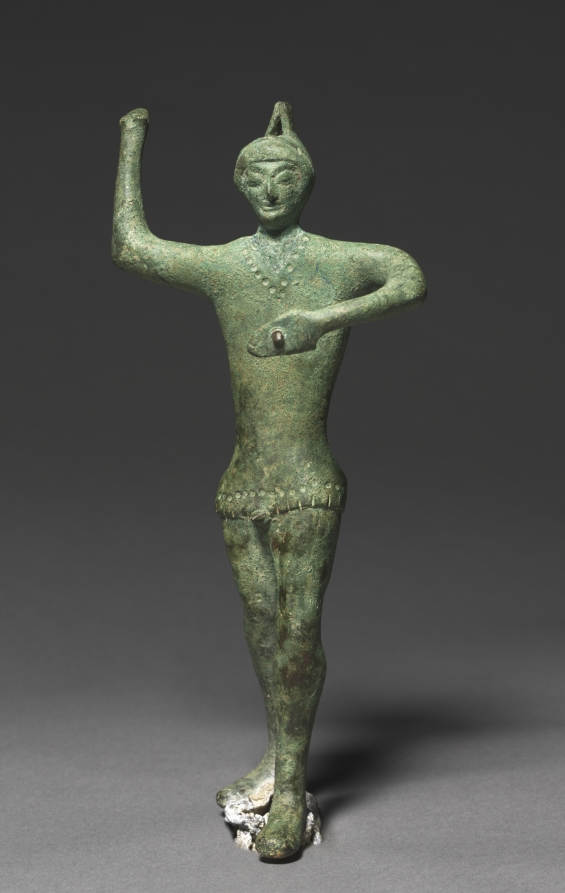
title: Statuette of a Warrior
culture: Etruscan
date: 500–450 BCE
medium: bronze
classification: Sculpture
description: Striding forward with its left foot, this warrior likely once held a shield in the left hand and a spear or sword in the right. The statuette was acquired together with a miniature bronze sword with which it was said to have been found; a photograph taken around 1890 shows the warrior with the sword attached—probably wrongly—to the left hand. He wears an unusual helmet with two raised elements on top, and a simple v-neck cuirass or tunic with a lower border of dots and flaps. Many similarly posed bronze figurines have been found across central Italy, but scholars disagree as to whether they represent divine or mortal warriors.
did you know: The lump of lead beneath its feet probably once secured this figurine to a base.